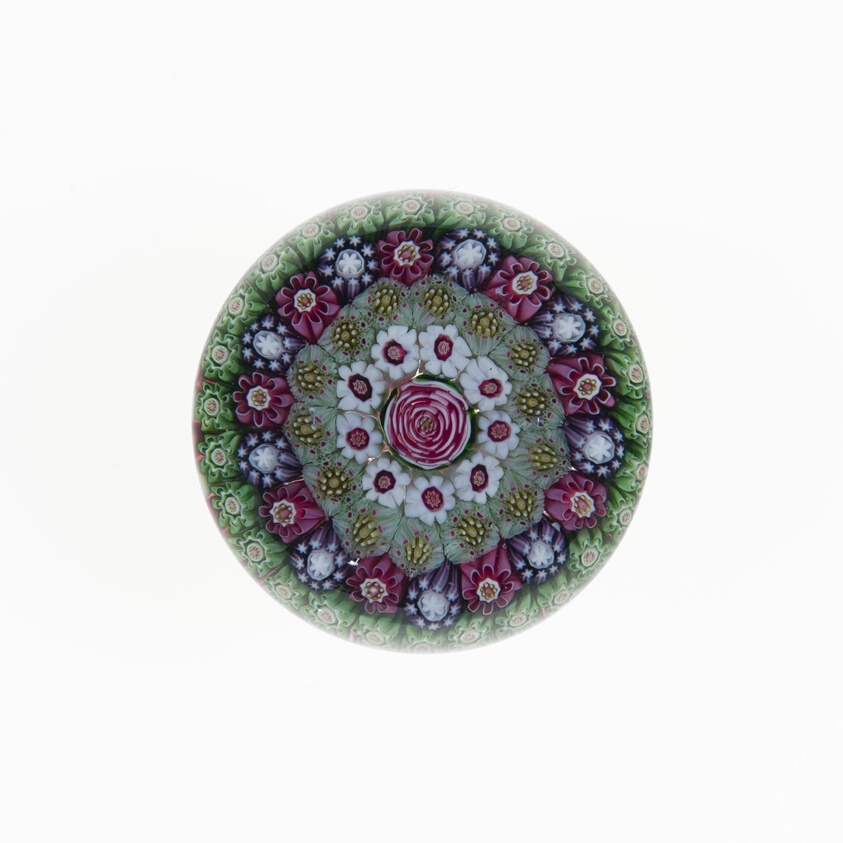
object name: Glass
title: Paperweight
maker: Clichy Glassworks (Cristalleries de Clichy); Clichy, France, 1837-1885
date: c. 1845–60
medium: Glass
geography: Clichy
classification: paperweight; glass